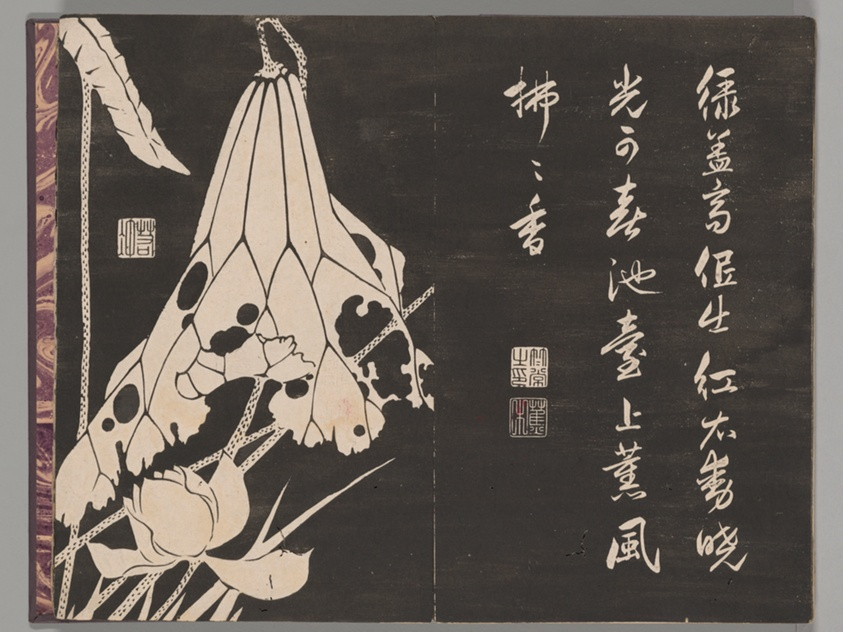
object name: Book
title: Soken sekisatsu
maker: Ito Jakuchu (Japanese, 1716-1800)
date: 1767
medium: Woodblock printed book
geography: Japan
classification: book